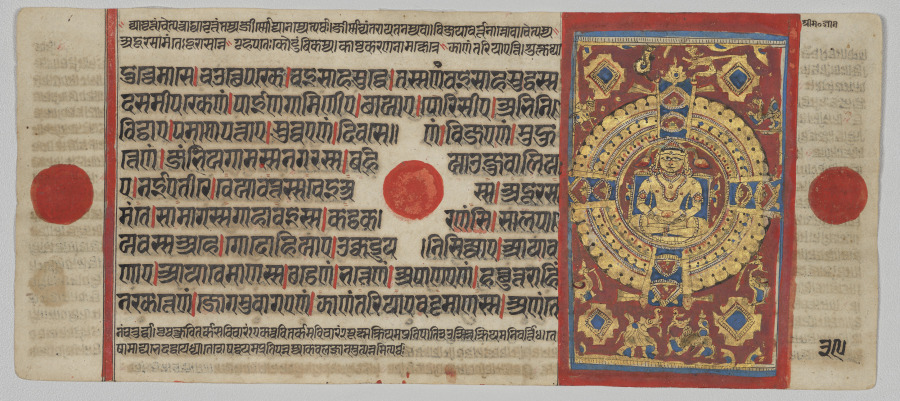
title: Mahavira's Omniscience and First Teaching (Samavasarana), Folio 39 (verso), from a Kalpa-sutra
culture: Western India, Gujarat, last quarter of the 15th century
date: c. 1475–1500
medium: Gum tempera, ink, and gold on paper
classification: Painting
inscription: [[upper right]] Śrī Ma* jñāna